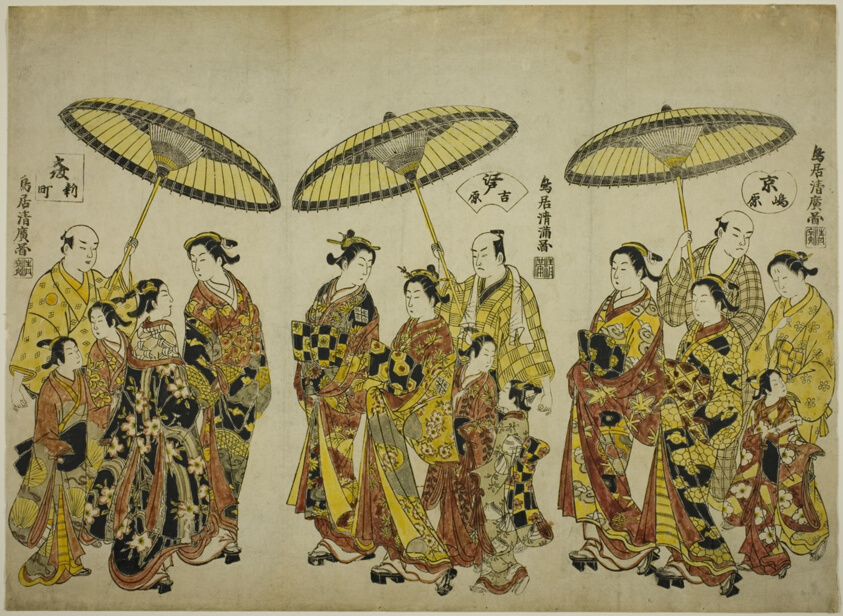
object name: Print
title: Beauties of the Three Capitals: Shimabara in Kyoto (right), Yoshiwara in Edo (center), and Shinmachi in Osaka (left)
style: Japanese (culture or style)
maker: Torii Kiyohiro; Japanese, active c. 1737-76; and; Torii Kiyomitsu I; Japanese, 1735–1785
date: c. 1755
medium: Hand-colored woodblock print; uncut hosoban triptych, urushi-e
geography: Japan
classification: woodblock print; print; asian art